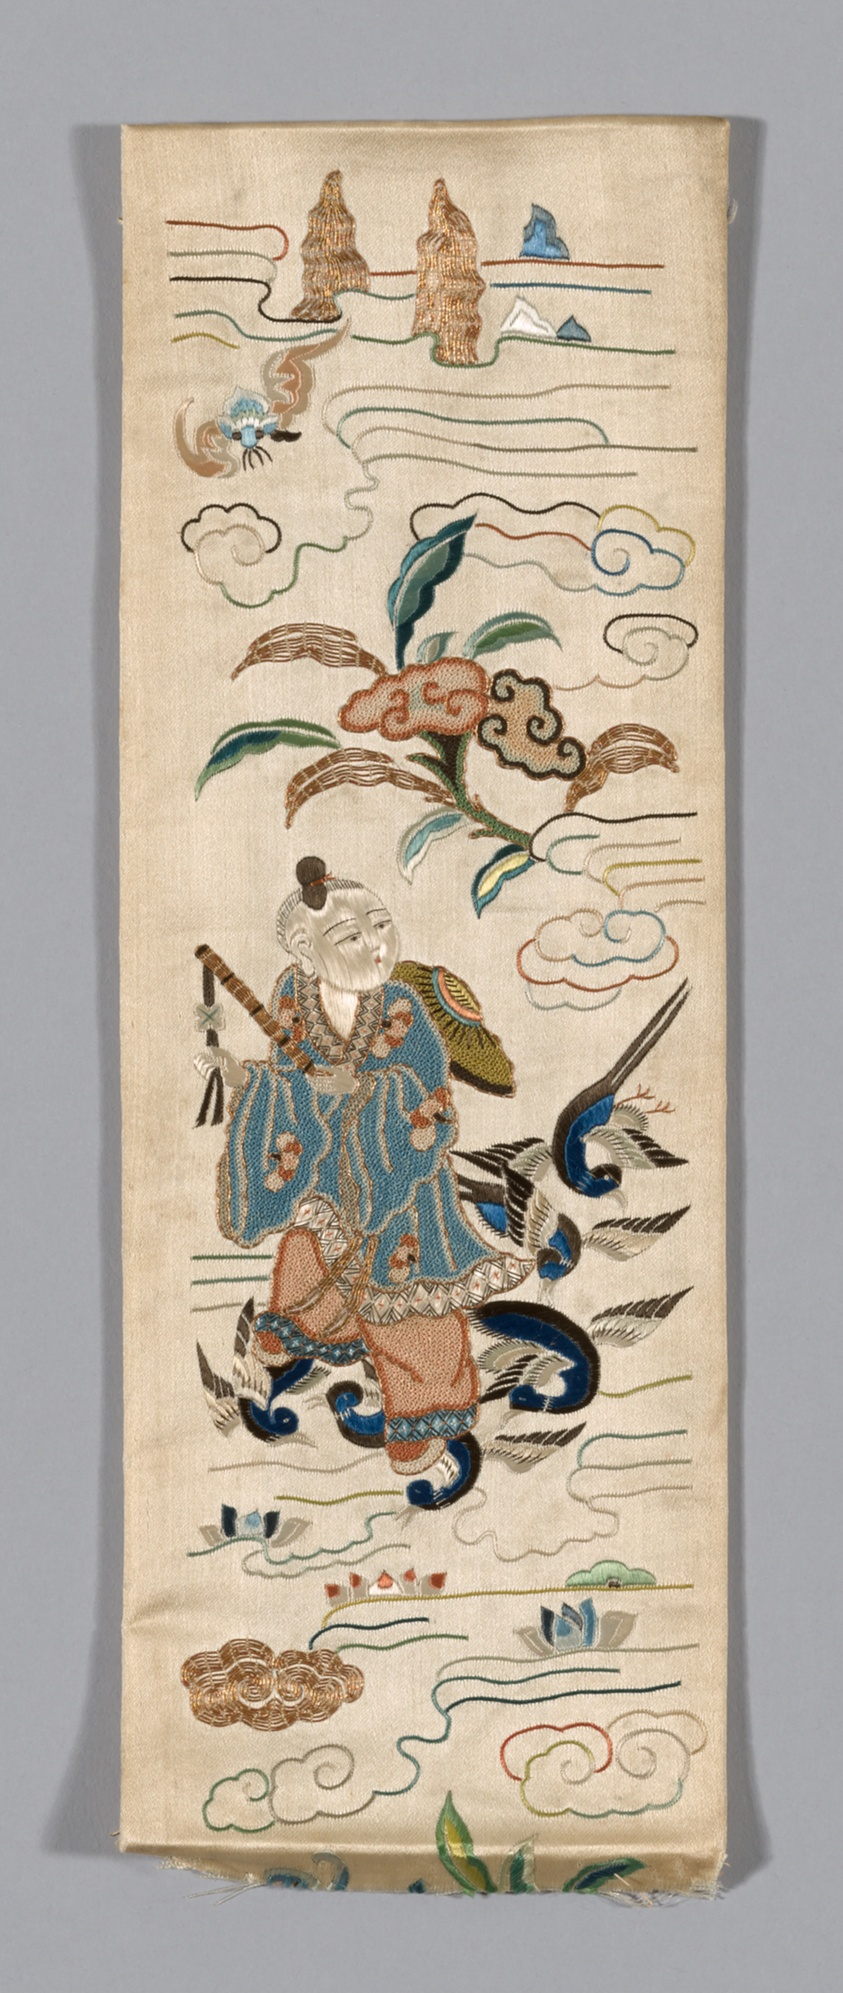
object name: Costume and Accessories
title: Sleeve band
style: han (chinese), qing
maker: Han-Chinese (China)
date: Qing dynasty (1644–1911), 19th century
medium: Couched and embroidered sleeve-bands from a robe, cut and framed as a three-panel folding desk screen. Two lower halves joined to form central frame, top halves form panels at either side. Figures and auspicious symbols in colors and gold on ivory silk grou nd.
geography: China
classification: costume - needlework; needlework (visual works); costume